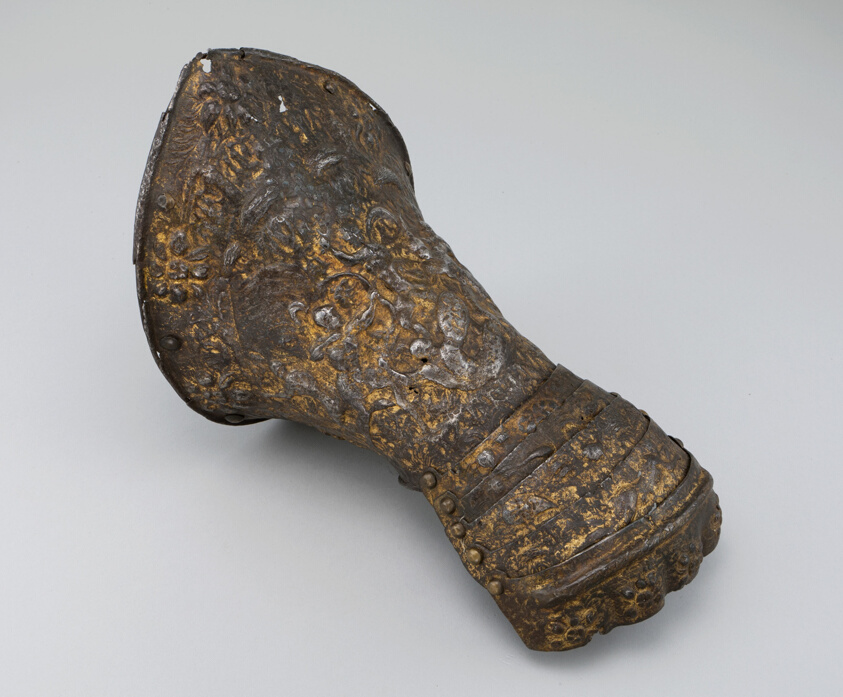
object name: Armor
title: Gauntlet for the Right Hand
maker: French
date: c. 1570/90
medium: Steel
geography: France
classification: suit-gauntlet; armor; arms and armor